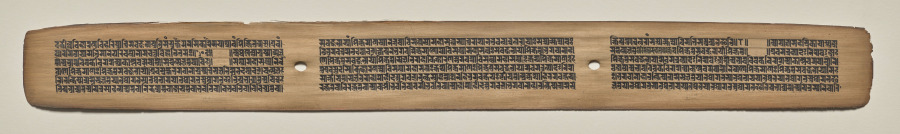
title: Text, Folio 149 (recto), from a Manuscript of the Perfection of Wisdom in Eight Thousand Lines (Ashtasahasrika Prajnaparamita-sutra)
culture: Eastern India, Bihar, Vikramashila Monastery. Painting: Nepal, Kathmandu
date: Sunday, September 14, 1119 (year 239 of the Newar Samvat in the month of Ashvina)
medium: gum tempera and ink on palm leaves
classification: Painting